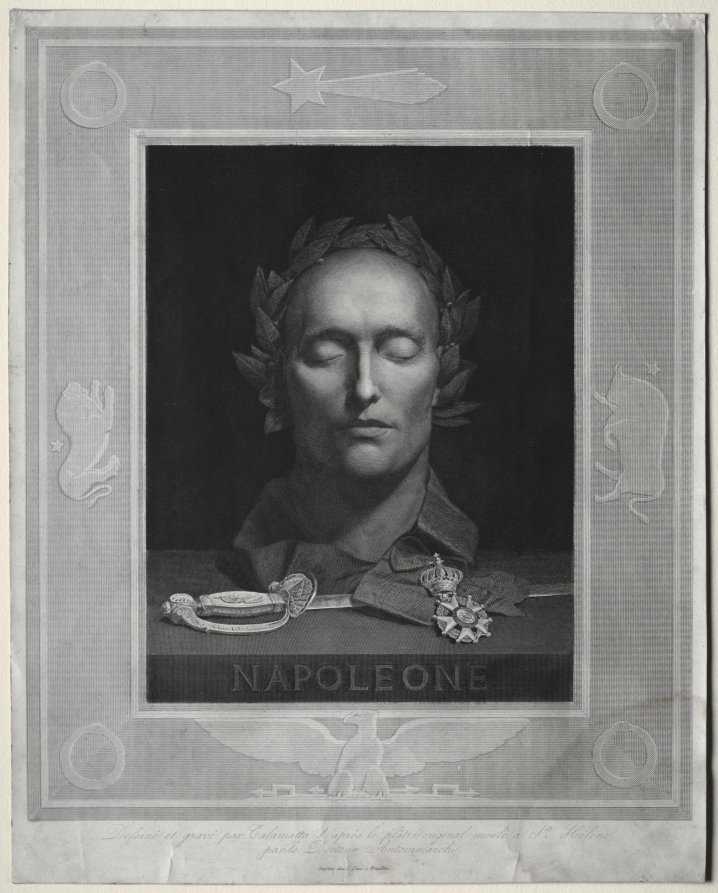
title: Mask of Napoleon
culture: Italy, 19th century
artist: Luigi Calamatta (Italian, 1801–1869)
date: 1834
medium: engraving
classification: Print